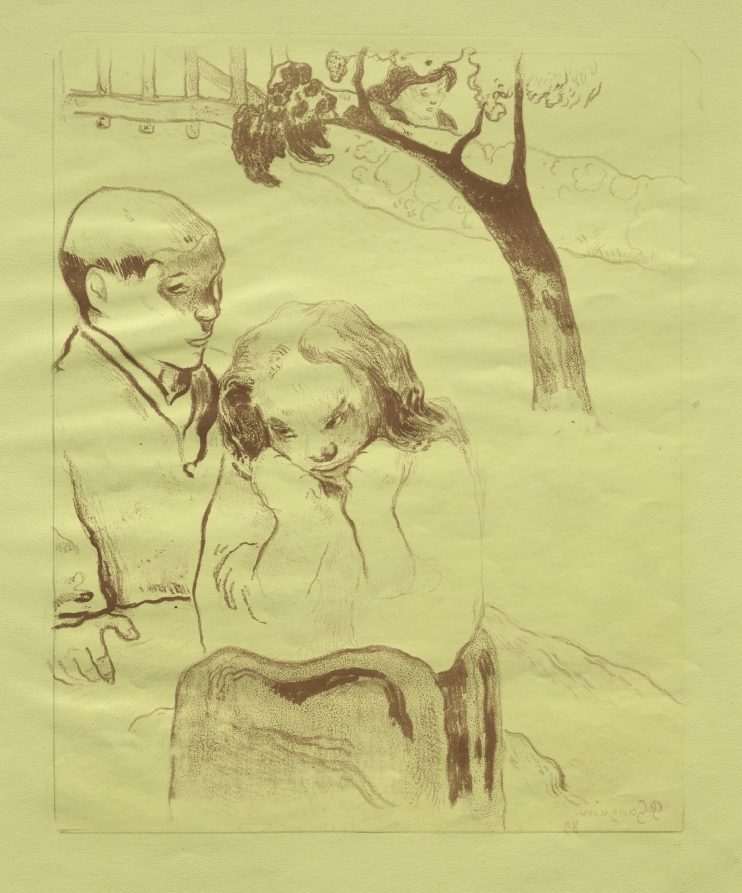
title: Volpini Suite: Human Misery (Misères Humaines)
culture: France, 19th century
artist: Paul Gauguin (French, 1848–1903)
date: 1889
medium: zincograph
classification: Print